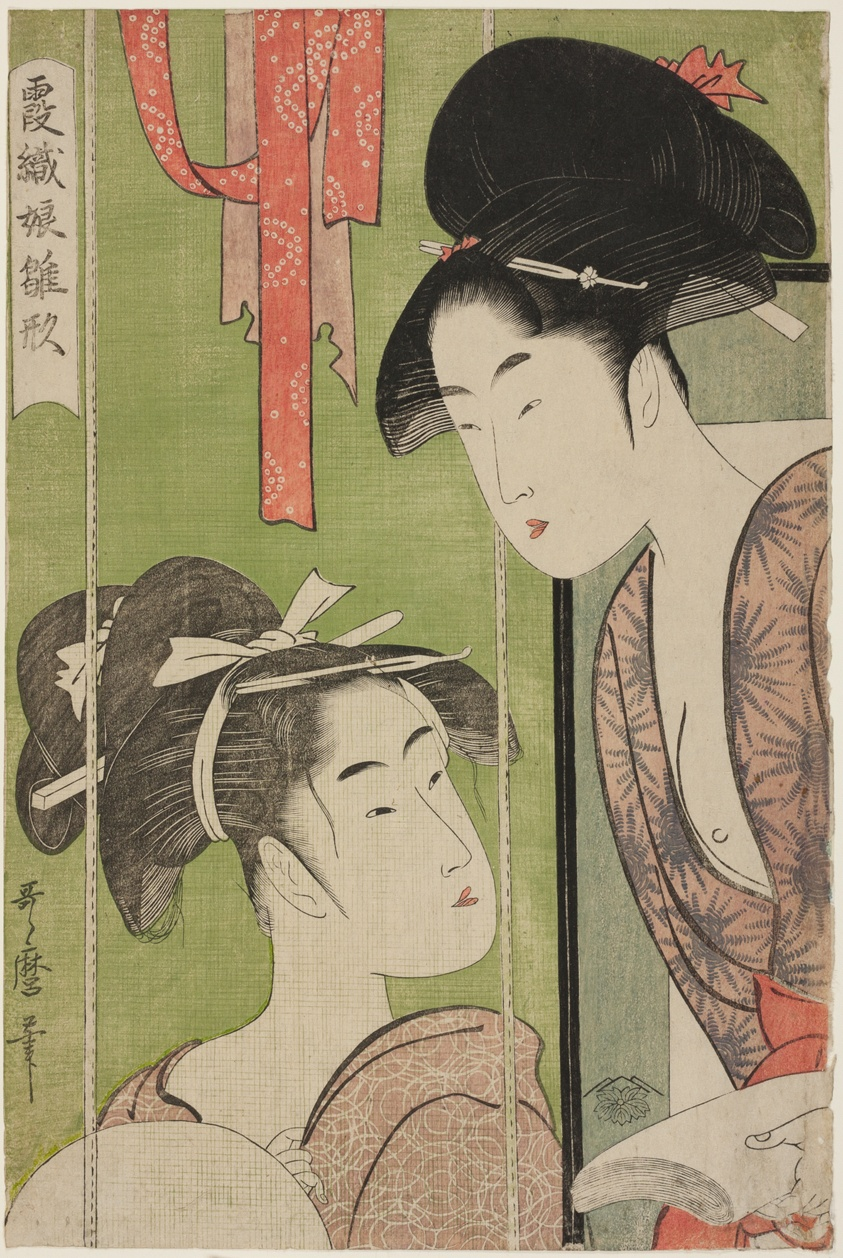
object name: Print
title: Mosquito Net, from the series Model Young Women in Mist (Kasumi-ori musume hinagata) (Kaya)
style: Japanese (culture or style)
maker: Kitagawa Utamaro 喜多川 歌麿; Japanese, 1753 (?)-1806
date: c. 1794/95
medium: Color woodblock print; oban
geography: Japan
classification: woodblock print; print; asian art